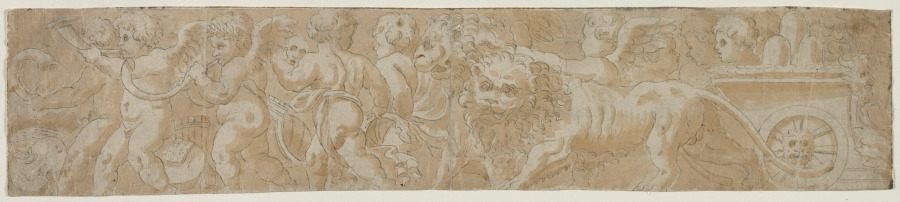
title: Chariot Drawn by Lions with Amorini (recto) Partial Architectural Study (verso)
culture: Italy, 16th century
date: first half 1500s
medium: pen and brown ink and brush and brown wash over black chalk; framing lines in brown ink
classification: Drawing